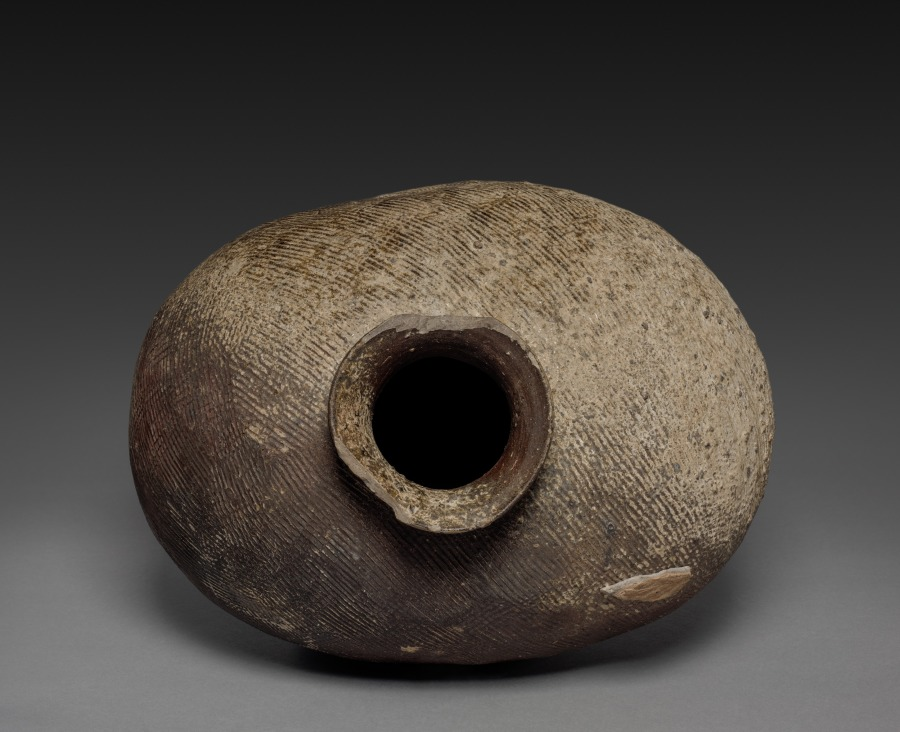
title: Jug with Oblong Body: Sueki Ware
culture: Japan, Nara period (710–94)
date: 700s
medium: stoneware, with impressed decoration and natural ash glaze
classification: Ceramic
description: The unusual shape of this sturdy vessel derives from two deep bowl forms being joined together at their mouths. An opening was then cut out where the separately formed neck and mouth were attached. This vessel shape came to early Japan from Korea, as did the paddled surface decoration technique.The jug's rich surface tonalities were created by wood ash in the kiln chamber that settled on the vessel during firing. The mottled gray areas indicate where large accumulations of ash adhered to the hot body. The darker, green skin that appears shiny or reflective represents generous ash accumulations that vitrified, becoming a natural green glaze. In one area this accumulation is so rich that it formed rivulets of glassy green glaze, propelled across the black matte surface by the fiery winds coursing within the kiln.